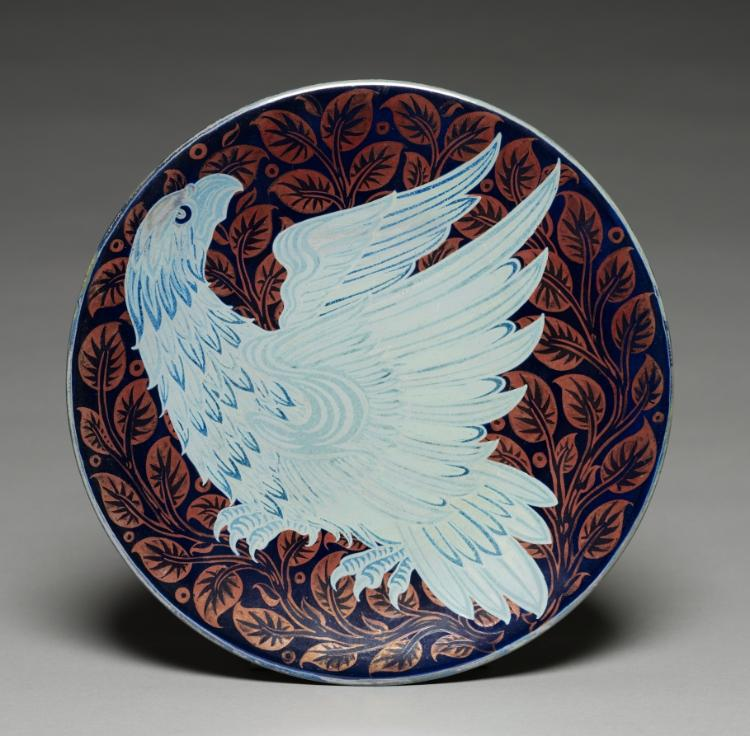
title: Dish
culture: England, 19th century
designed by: William Frend De Morgan (British, 1839–1917)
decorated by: Charles Passenger (British)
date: c. 1900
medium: ceramic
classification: Ceramic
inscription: signed on back: C.P.